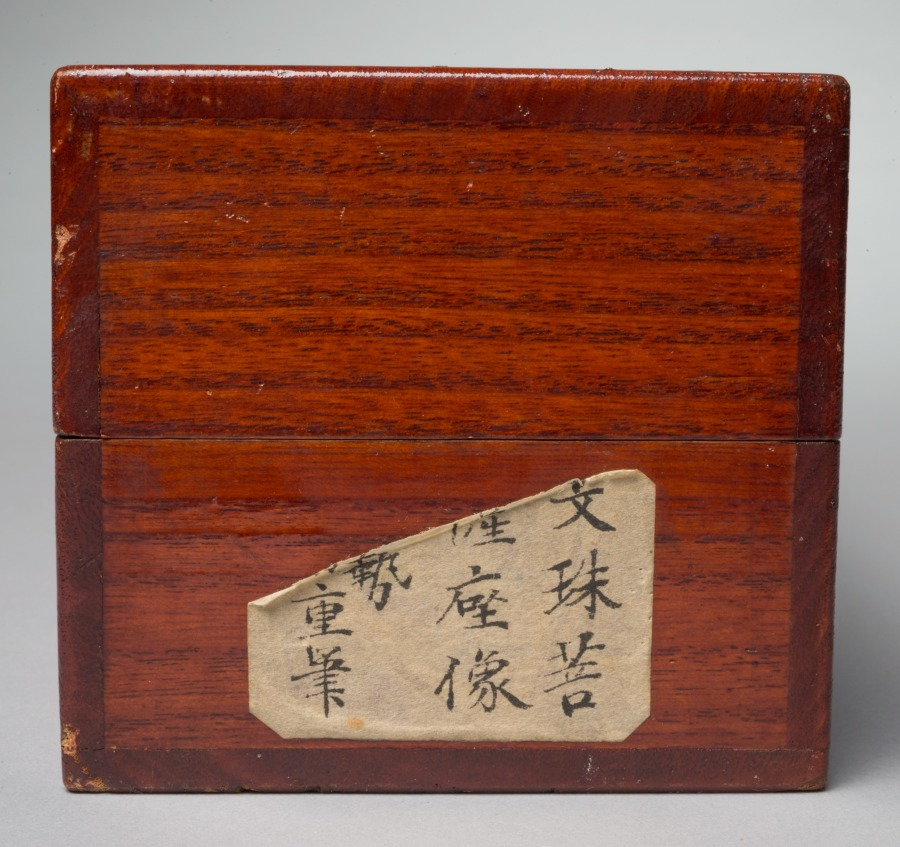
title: Monju as a Child (Chigo Monju)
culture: Japan, Muromachi period (1392–1573)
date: early 1400s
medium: hanging scroll; ink, color, and gold on silk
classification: Painting